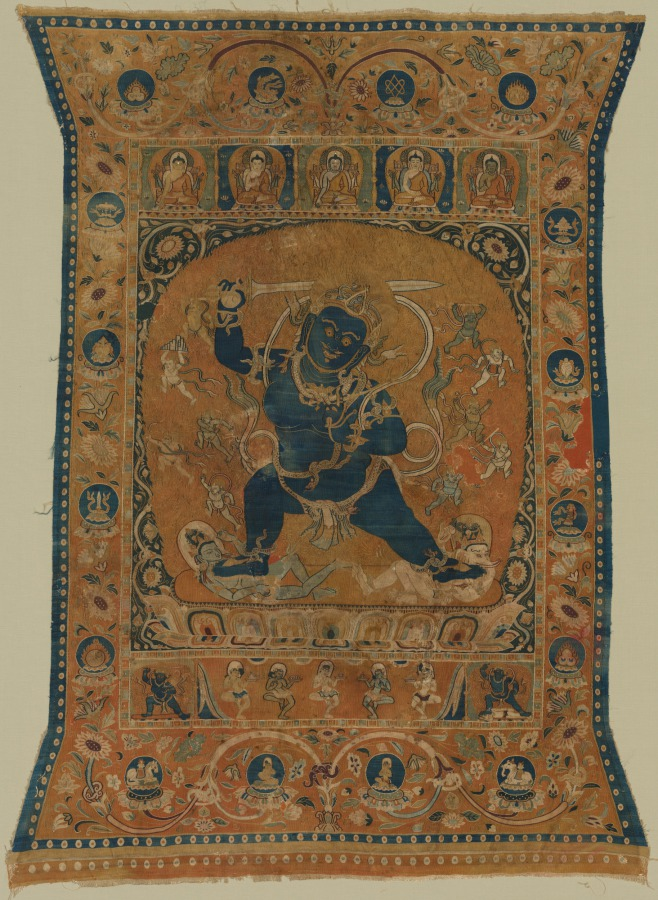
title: Achala, King of the Wrathful Ones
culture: China, Zhejiang Province, probably Hangzhou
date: early 1200s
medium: Thangka, silk tapestry with pearls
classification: Textile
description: The powerful blue body of Achala, meaning “immovable,” dominates the composition. He holds a sword to cut through ignorance and a noose for catching illusions that plague the path to enlightenment. Small personifications of furious destroyers of illusion (maya) emanate from him on either side, each with his own weapon. This image expresses what advanced practitioners would visualize in meditation rituals, as explained in Buddhist texts called tantras. Woven with a sophistication matched only by products of the Hangzhou looms, this devotional tapestry made its way to Khara-Khoto, capital of the Tangut Empire located in present-day Mongolia and Central Asia, where tantric Buddhism was prevalent.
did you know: The elephant-headed figure under his left foot is a demonic divinity, a yaksha, who creates obstacles to enlightenment.